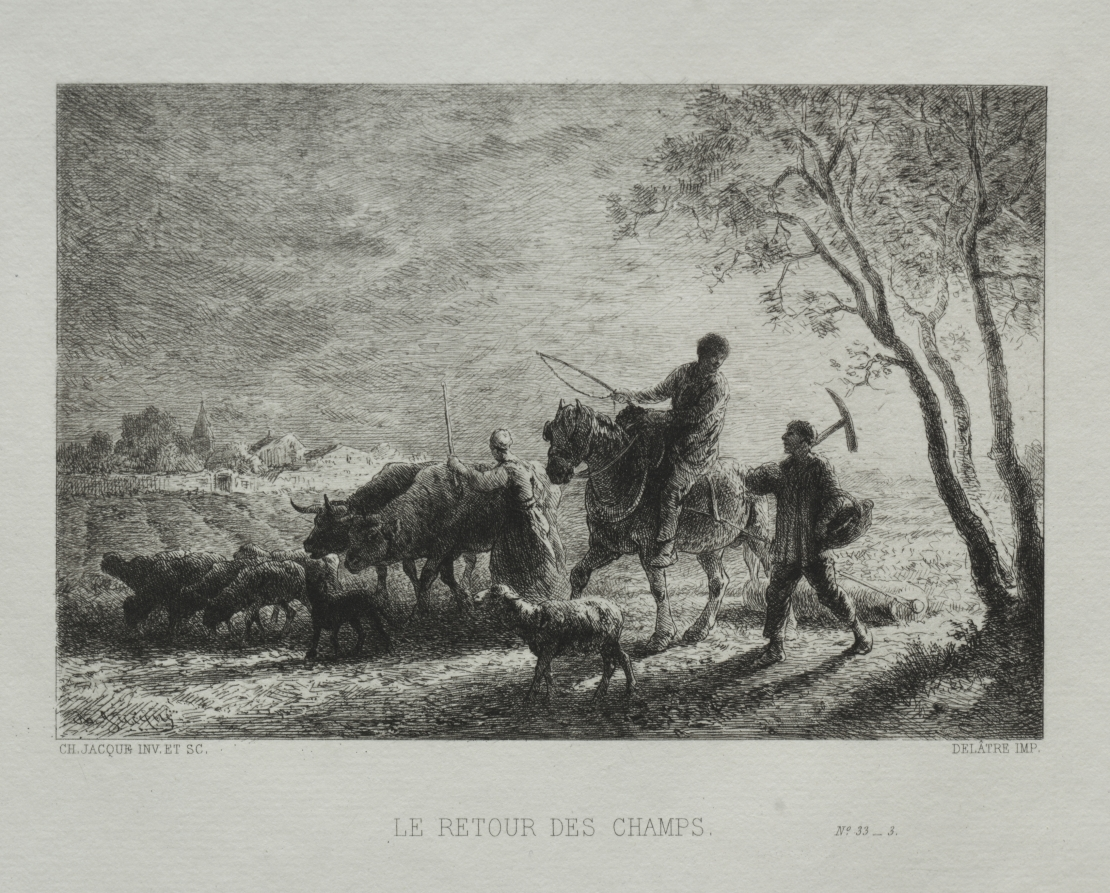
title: Return from the Fields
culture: France, 19th century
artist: Charles-Émile Jacque (French, 1813–1894)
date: 1865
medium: etching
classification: Print